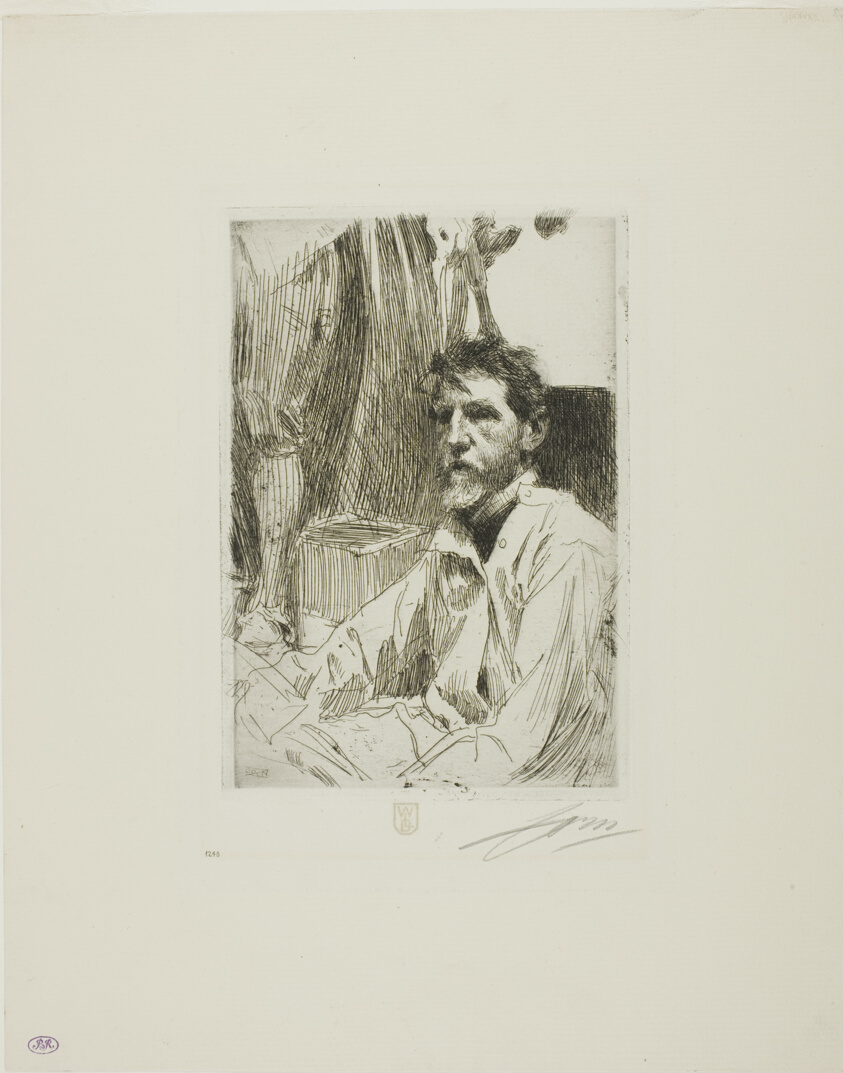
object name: Print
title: August Saint Gaudens I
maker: Anders Zorn (Swedish, 1860-1920)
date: 1898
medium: Etching on ivory laid paper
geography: Sweden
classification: etching; print; prints and drawing